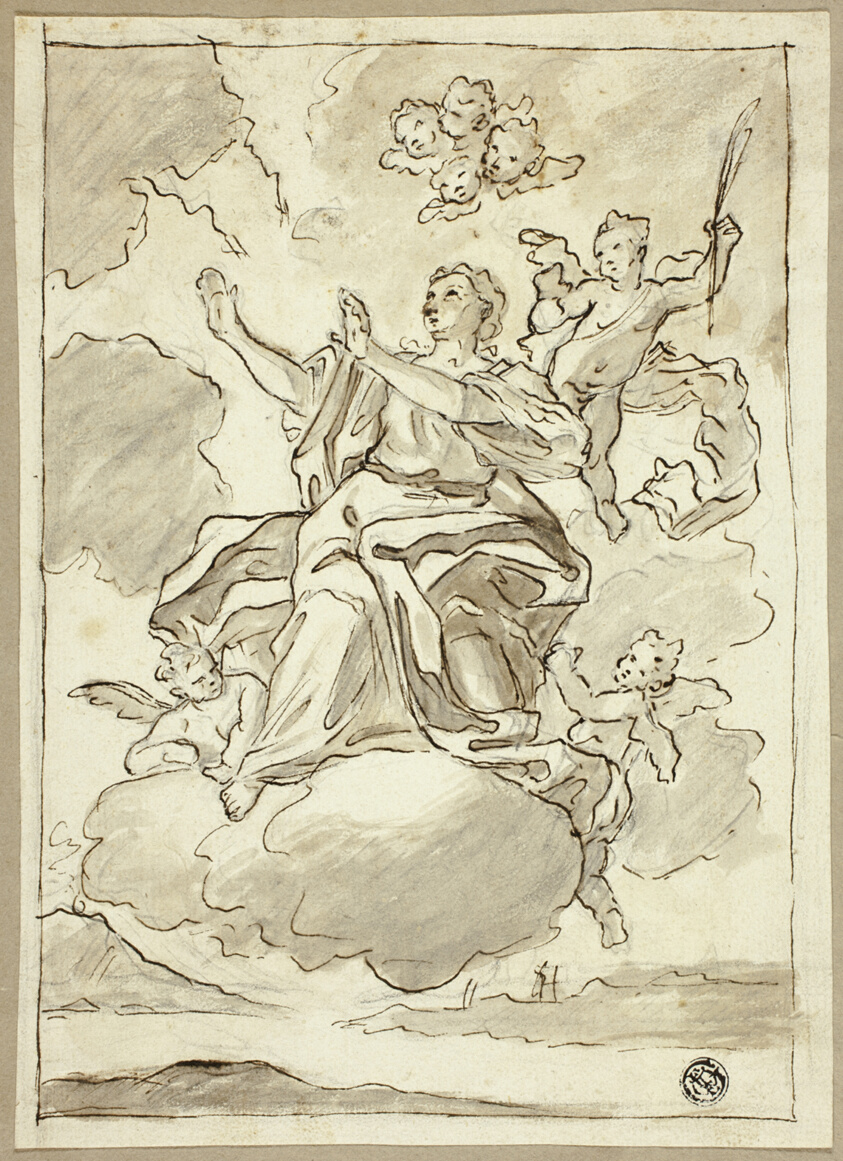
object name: Drawing and Watercolor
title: Ascension of Female Saint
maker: Martino Altomonte (Italian, 1657-1745); or the School of Francesco Solimena (Italian, 1657-1747)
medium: Pen and brown ink, with brush and brown wash, over black chalk, on ivory laid paper, laid down on brown wove paper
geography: Italy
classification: pen and ink drawings; drawings (visual works); prints and drawing